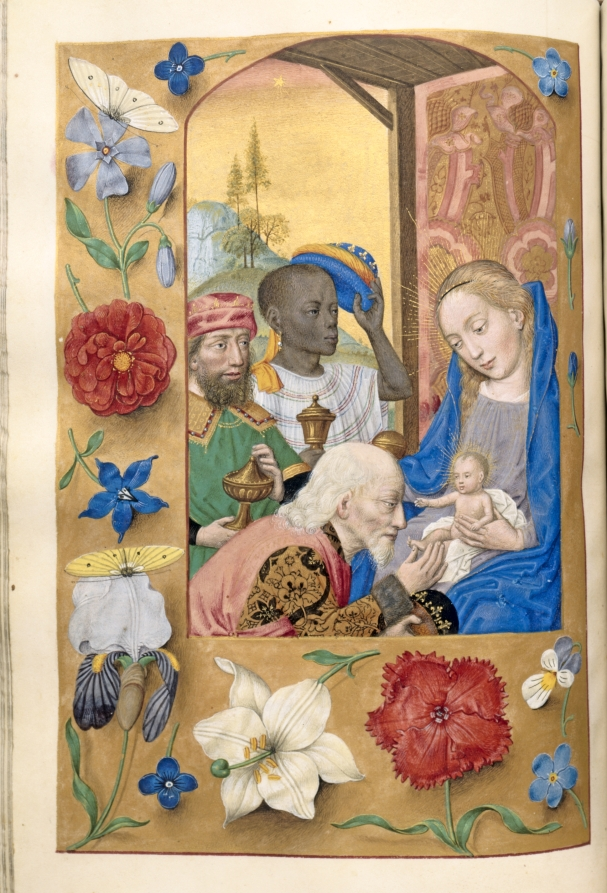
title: Hours of Queen Isabella the Catholic, Queen of Spain: Fol. 136v, Adoration of the Magi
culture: Flanders, Ghent and Bruges, late 15th century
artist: Master of the First Prayerbook of Maximillian (Flemish, c. 1444–1519)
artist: and Associates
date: c. 1500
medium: ink, tempera, and gold on vellum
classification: Bound Volume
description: This manuscript was illuminated by a circle of at least five highly organized manuscript painters active in the Flemish cities of Ghent and Bruges. The principal illuminator was Alexander Bening, who painted the majority of the book's miniatures. Manuscripts produced by this circle of artists are renowned for the decoration of their borders, which typically feature a rich variety of realistically-painted flowers, birds, and butterflies. This prayer book, called a book of hours, was intended not for a cleric, but for the private devotions of a lay person-in this case, Isabella the Catholic, Queen of Spain (1451-1504). Isabella's coat of arms embellishes the book's frontispiece. It is unlikely that the book was commissioned by the Queen herself; rather, she probably received it as a diplomatic gift from someone courting her patronage, perhaps Cardinal Francisco Jimenez de Cisneros. A Franciscan friar, Jimenez was dependent upon Isabella for his advancement, first to the post of Queen's confessor in 1492, and then to Archbishop of Toledo in 1495.